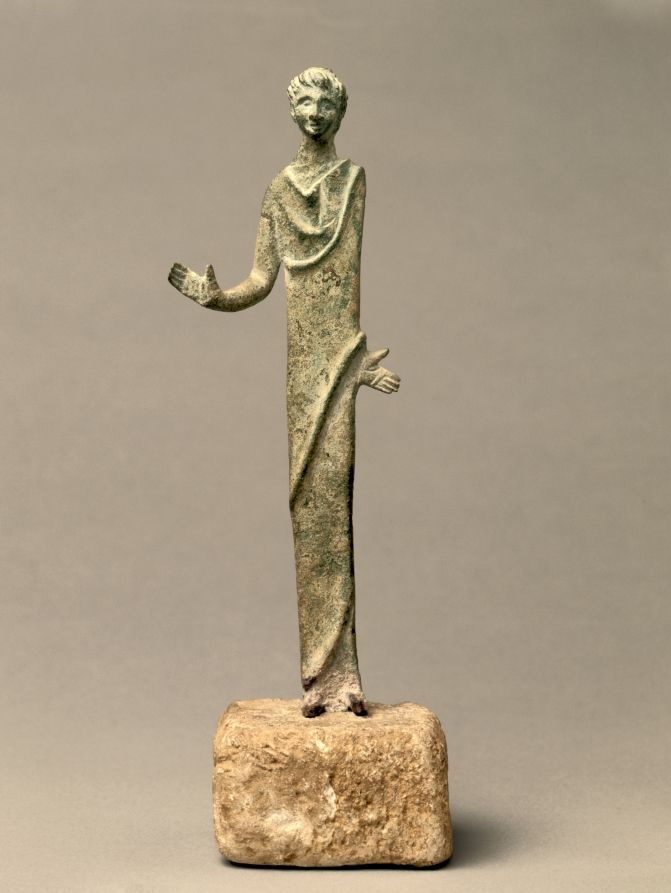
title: Male Votive Figure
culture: Etruscan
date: 300s BCE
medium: bronze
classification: Sculpture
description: This Etruscan votive figure is posed with his hands turned to expose his palms, one near his hip, the other projecting laterally. With the exception of the fully three-dimensional head and the extended right arm and hand, the side profile of this figure is shockingly flat. The tall man’s back is not only extremely thin but also an almost perfectly vertical column. Other examples of this votive figure type are even more elongated, and some hold small cups or libation dishes, as if making offerings. Some scholars have suggested that these votive figures may represent shadows due to their extreme height and relative lack of depth, while others have seen connections to much older traditions of relatively flat cult images, whether of wood or metal.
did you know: This bronze statuette was cast in a single piece.